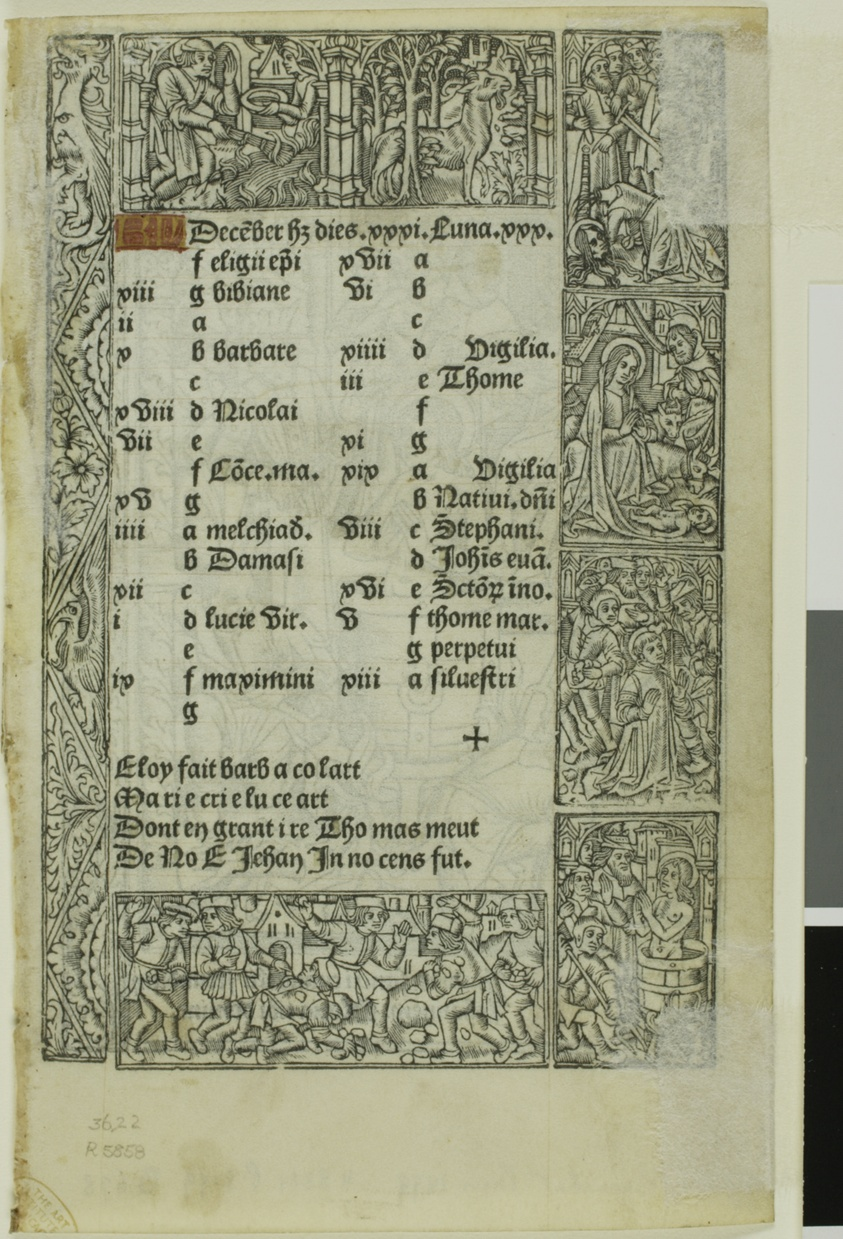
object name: Print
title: The Martyrdom of Saint John the Evangelist (recto), and December Calendar (verso), from Book of Hours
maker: Philippe Pigouchet (French, active 1488-1518); published by Simon Vostre (French, active 1486–1518)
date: 1496/97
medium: Metalcut and letterpress in black with rubrication (recto/verso) on vellum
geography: France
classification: woodcut; print; prints and drawing